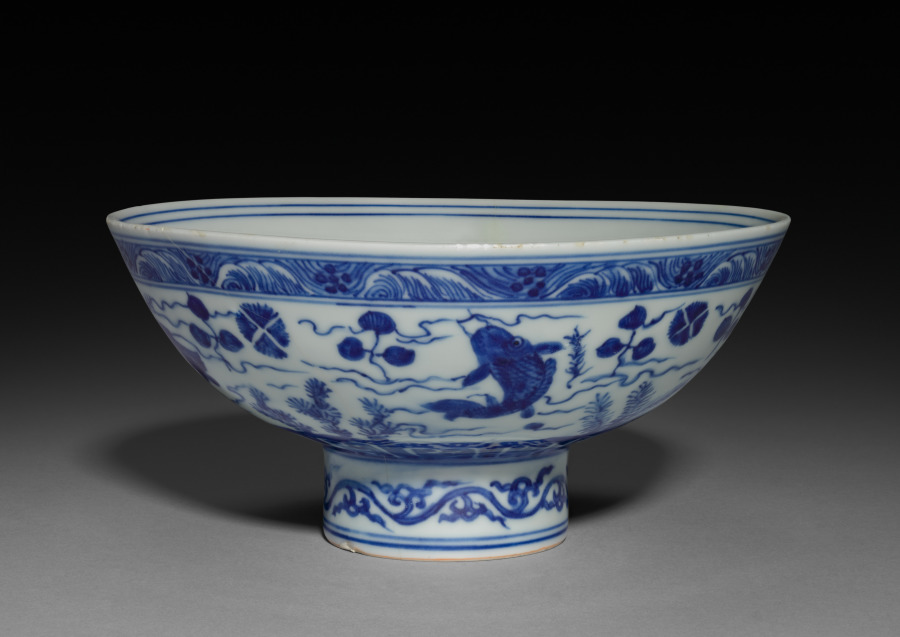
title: Bowl with Fish and Water Plants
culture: China, Jiangxi province, Jingdezhen kilns, Ming dynasty (1368-1644), Jiajing mark and reign (1522-66)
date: 1522–66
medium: porcelain with underglaze blue decoration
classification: Ceramic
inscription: 大明嘉靖年製